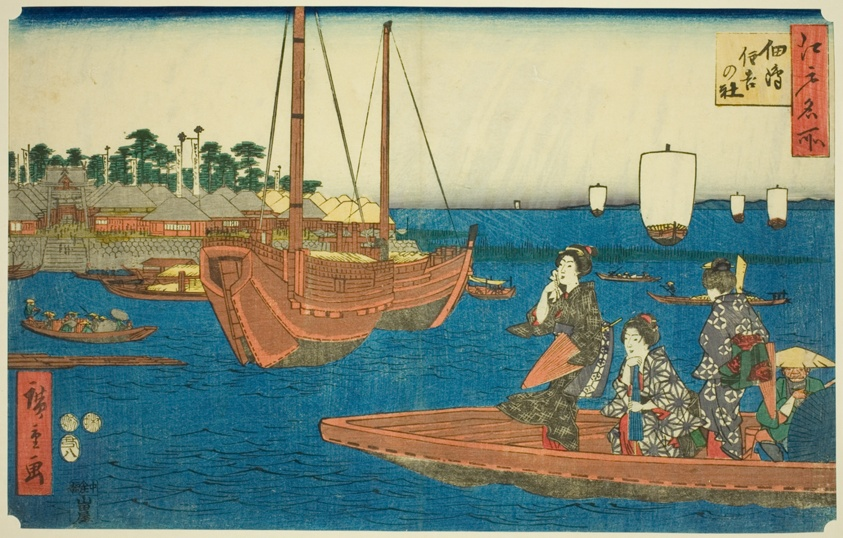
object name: Print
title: The Sumiyoshi Shrine on Tsukuda Island (Tsukuda Sumiyoshi no yashiro), from the series "Famous Places in Edo (Edo meisho)"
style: Japanese (culture or style)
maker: Utagawa Hiroshige 歌川 広重; Japanese, 1797-1858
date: 1853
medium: Color woodblock print; oban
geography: Japan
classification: woodblock print; print; asian art